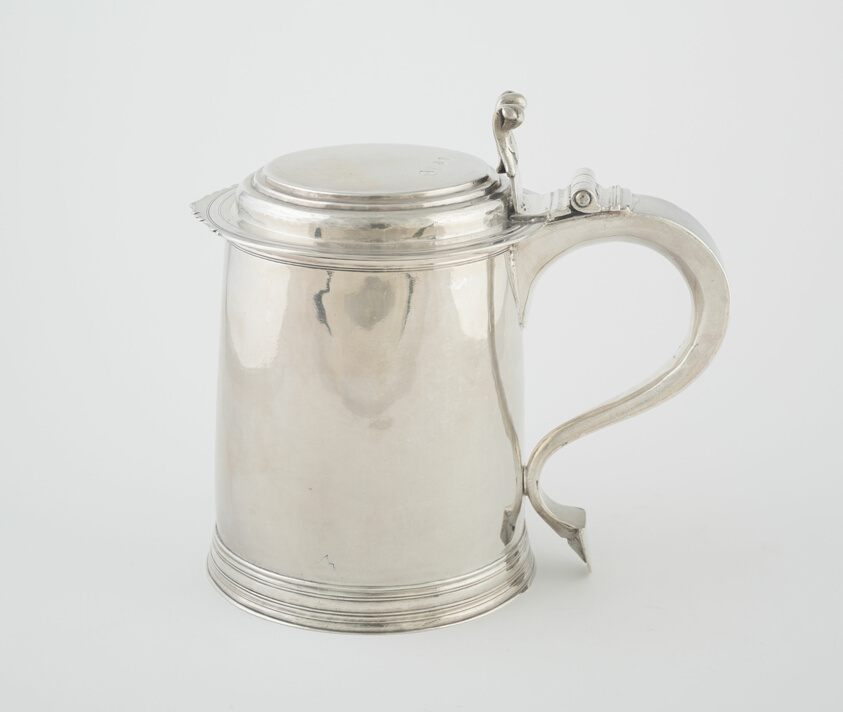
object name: Metalwork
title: Tankard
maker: William Penstone; English, active 1700; London, England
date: 1700/01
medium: Silver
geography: London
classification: drinking vessel; silver; metalwork; european decorative arts